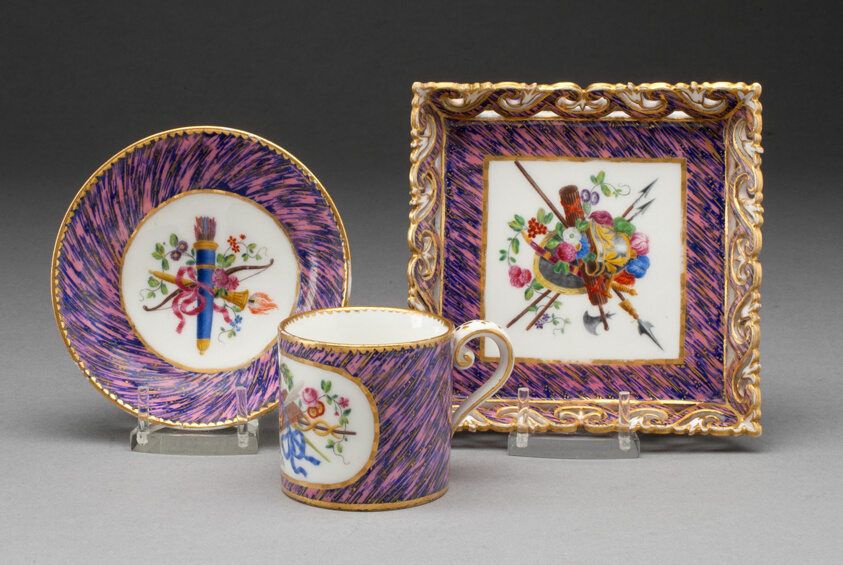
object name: Ceramics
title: Coffee Cup, Saucer, and Tray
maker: Sèvres Porcelain Manufactory; French, founded 1740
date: 1761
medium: Soft-paste porcelain, pink and blue ground, polychrome enamels, and gilding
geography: Sèvres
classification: drinking vessel; teaware; ceramics; porcelain; european decorative arts